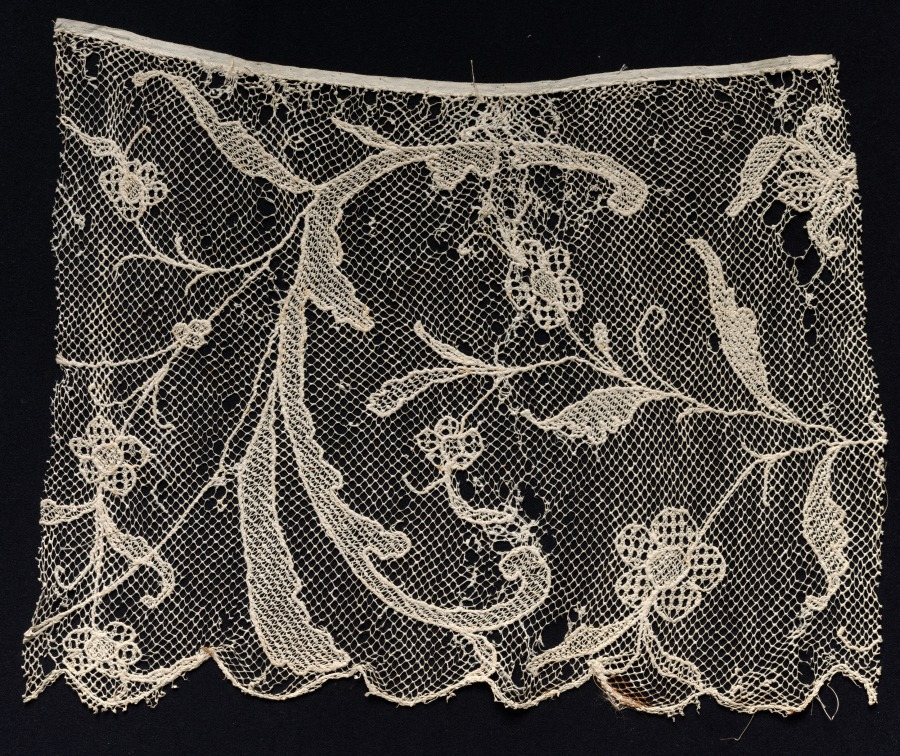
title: Fragment of a Border with Floral Motif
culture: Spain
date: 1700s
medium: Bleached linen (est.): needle lace, filet/lacis (knotted ground and darned in one and two directions)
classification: Lace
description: The scalloped bottom edge of this lace fragment indicates that it was originally meant as the border for a larger work of lace or other textile.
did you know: Myrta Leonora Jones, the donor of this work, was a women’s rights activist in Cleveland in the early 20th century.